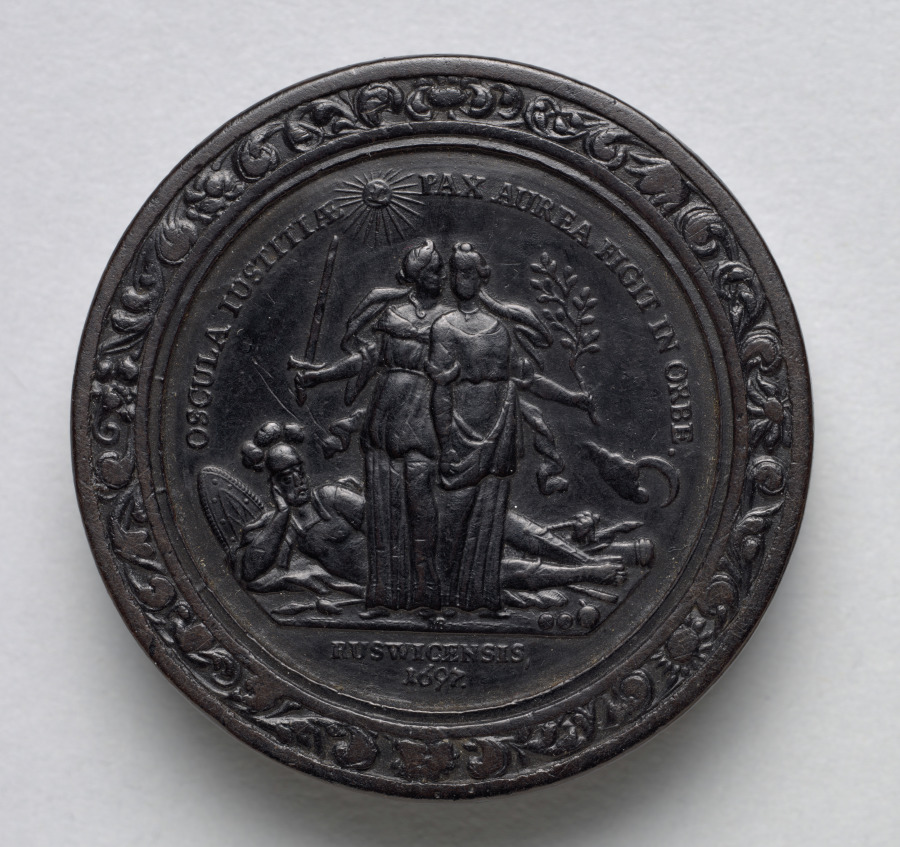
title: Gaming Piece (reverse)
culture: Germany, late 17th-early 18th Century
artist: Martin Brunner (German, 1659–1725)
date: c.1700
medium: wood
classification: Furniture and woodwork